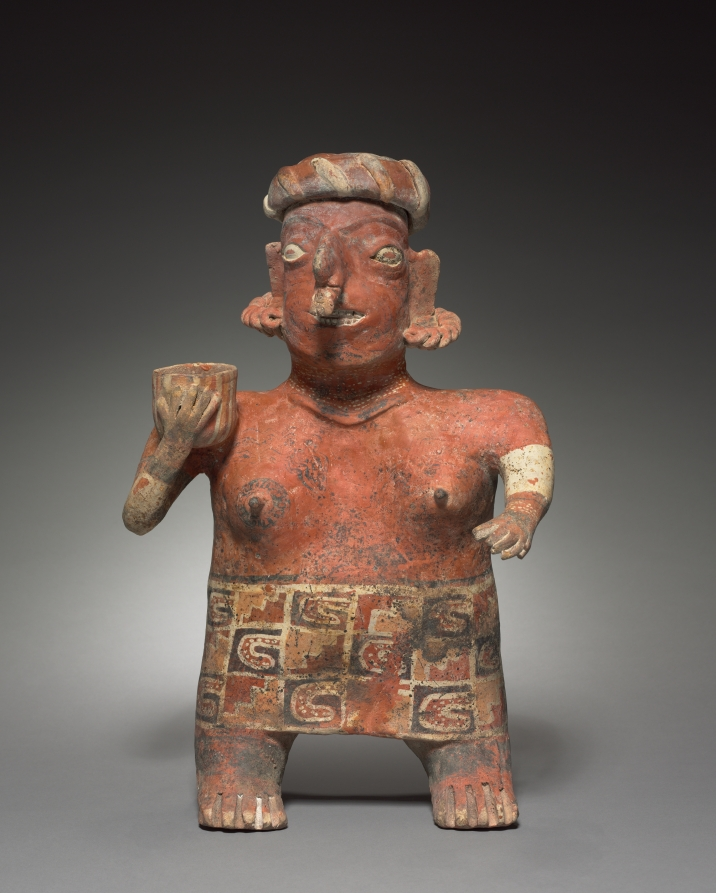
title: Standing Female Figure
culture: Mexico, Nayarit, Ixtlan del Rio style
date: c. 100 BCE–300 CE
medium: earthenware with colored slips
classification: Sculpture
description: Nagarit ceramic sculputres, like those of Colima, were manufactured for burial with the dead. The popular male-female couples may be portraits of the individuals with whom they were buried. This female figure, dressed in a colorful skirt and hat, has painted or tattooed patterns on her torso and face. Jewelry adorns her face, ears, and nose. The vessel on her shoulder symbolizes her domestic duties.